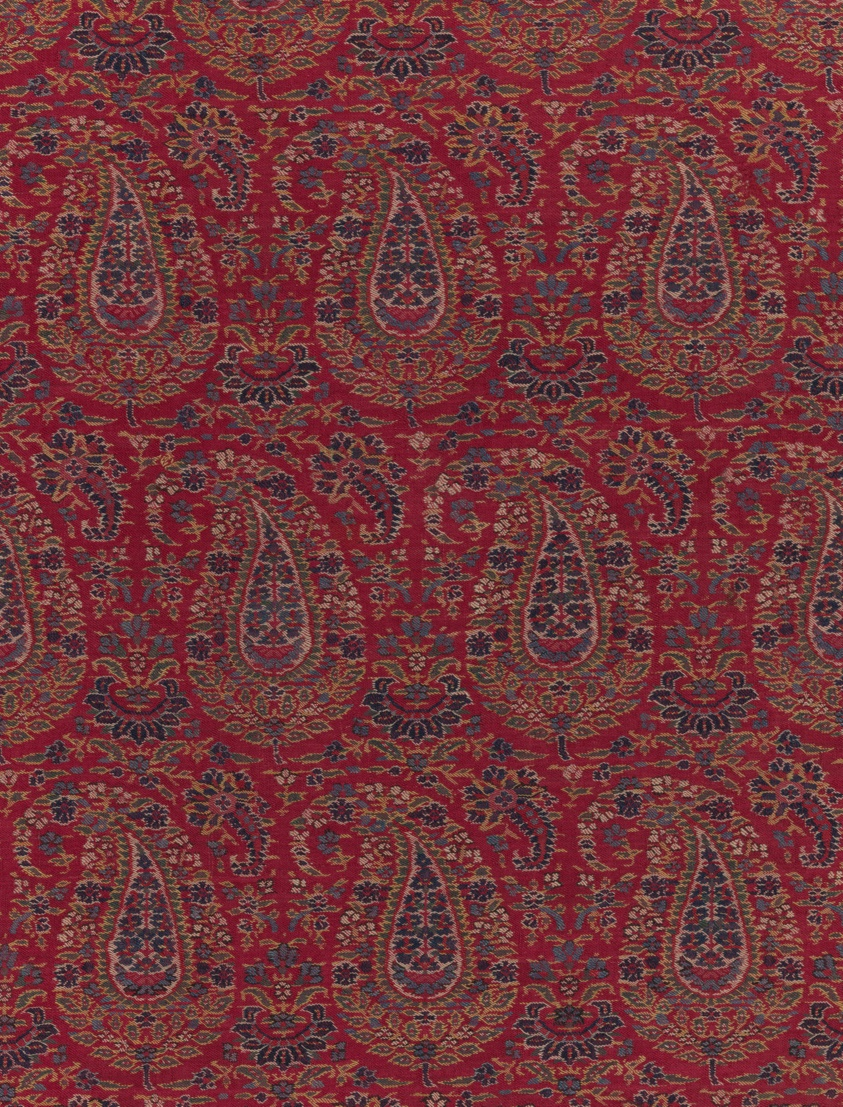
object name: Costume and Accessories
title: Kani Jamawar (Fabric for a Jama Coat or Shawl)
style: 19th century, kashmiri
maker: Probably Kashmir for the Persian market (present-day Iran)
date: 1825–75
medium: Wool, pieced double interlocking 2:2 'S' twill tapestry weave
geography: Kashmir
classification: textile; weaving; costume; garment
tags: paisley, botanical, floral, vines